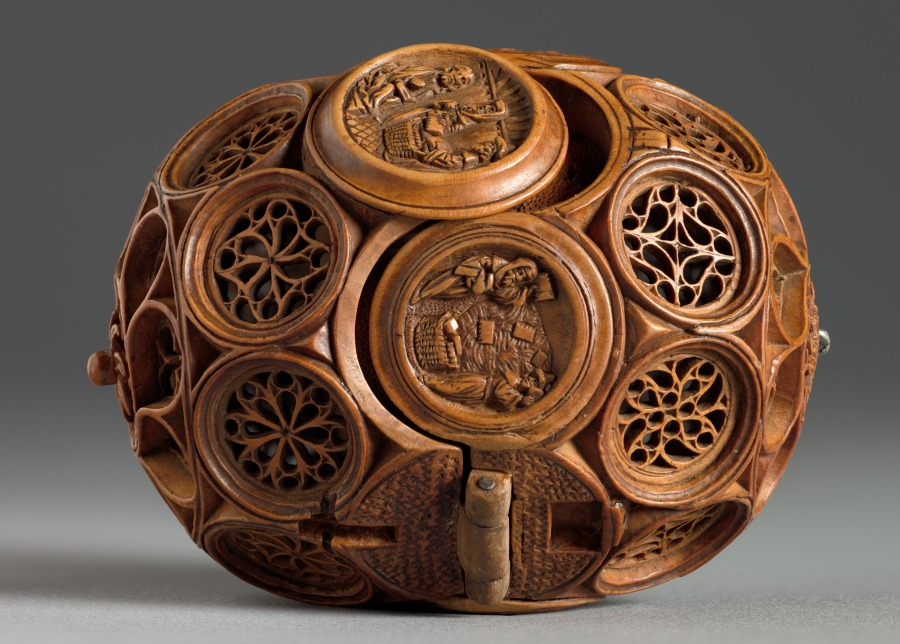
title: Prayer Nut with Scenes from the Life of St. James the Greater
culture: Northern Netherlands (Holland)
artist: Adam Dircksz (Netherlandish, active c. 1500)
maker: and Workshop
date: c. 1500–1530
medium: boxwood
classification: Sculpture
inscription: Interior around lower half: SANCTVS SACRILEGI STAT IVDICIS ANTE TRIBVNAL (Holiness stands before the throne of the profane judge)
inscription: Interior, around upper half: GAVDENS PRO CRISTO IACOBVS SVBDIT CAPVT ENSI (St James submits his head to the sword)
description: Prayer nuts are capsules that can be opened in half and were mainly worn from the end of the 1400s until 1530, particularly in the Netherlands. These objects are generally made from boxwood and carved with extreme refinement and delicacy. They often echo Gothic architecture and include openwork tracery or elaborate decorative patterns. Prayer nuts came into fashion for private devotion as a pendant on the rosary or on a decorative chain. The emergence of prayer nuts went hand in hand with the practice of praying the rosary more frequently at the end of the Middle Ages.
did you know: This miniature masterpiece was held and caressed within the palm of the holder as they prayed and meditated on their faith. What do you use to focus or engage in quiet concentration?